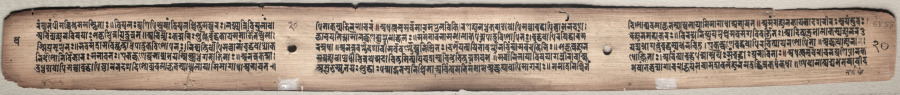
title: Text, folio 20 (verso) from a Gandavyuha-sutra (Scripture of the Supreme Array)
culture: Nepal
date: 1000–1100s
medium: ink on palm leaf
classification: Painting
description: According to the text, the exemplary youth Sudhana was inspired to seek enlightenment after hearing the teachings of Manjushri, the Bodhisattva of Wisdom. Manjushri sent him to find a teacher, who explained one aspect of reaching enlightenment, and who, in turn, sent him to find another, and on until he heard the teachings of 52 teachers and reached his goal.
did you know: In this text, enlightened teachers are called "True Friends" (kalyanamitra).